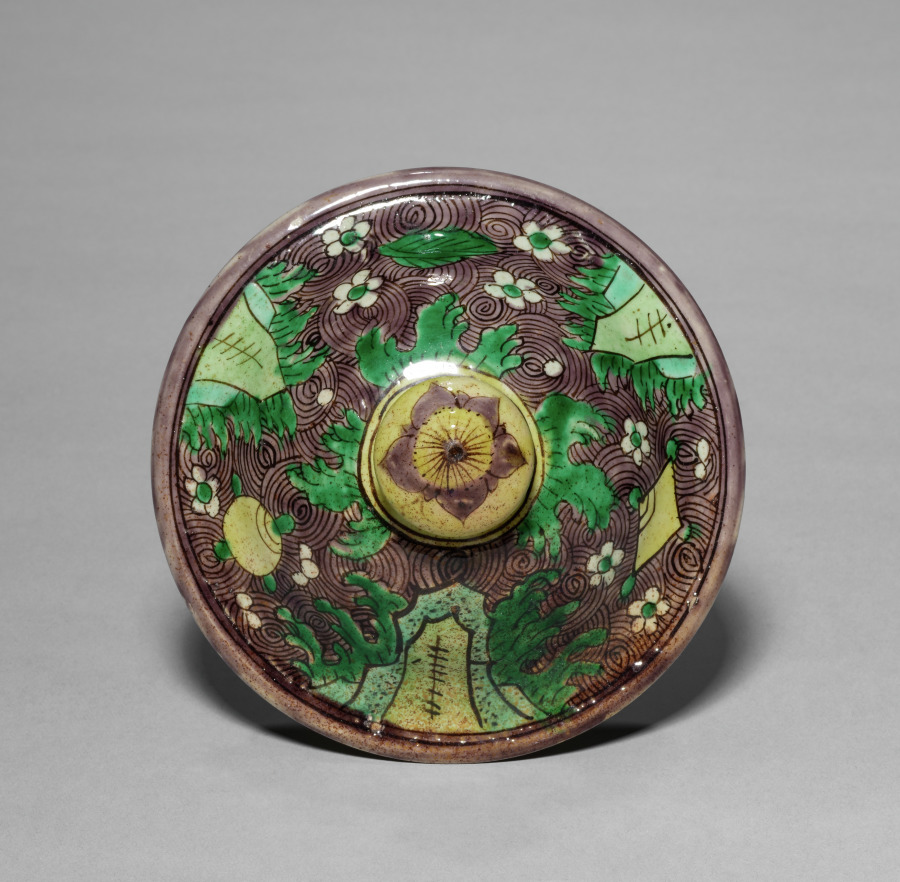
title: Baluster Jar and Cover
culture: China, Jiangxi province, Jingdezhen kilns, Ming dynasty (1368–1644) or Qing dynasty (1644–1911)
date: 1600–1650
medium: Porcelain with wucai (five-color) enamels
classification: Ceramic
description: The central motif on this jar is a mountain emerging from the sea, symbolizing Mount Sumeru in Buddhist cosmology, and representing the central axis in the universe in Daoism. White cherry blossoms floating on the wavy ground are surrounded by auspicious symbols such as the coin for wealth and the lozenge for victory. The yellow knob on the jar’s cover depicts a cherry blossom. Other fortuitous motifs—such as the leaf of protection, the pearl to grant wishes, the stone chime for celebration, rocks symbolizing longevity—also decorate the lid. While most jars have lost their covers over time, this jar retains its original lid.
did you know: The waves are depicted in a rich aubergine, or purple, glaze.